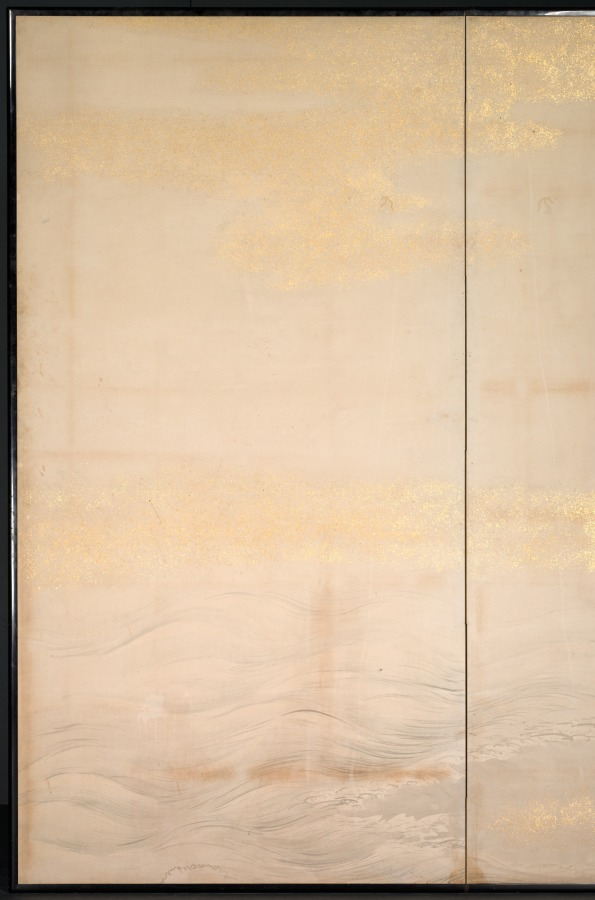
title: Geese, Reeds and Water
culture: Japan, Edo period (1615–1868)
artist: Yamamoto Baiitsu (Japanese, 1783–1856)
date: 1800s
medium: One of a pair of four-panel folding screens; ink, color, and cut gold foil on paper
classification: Painting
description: This byōbu composition differs from most in that it comprises two four-panel screens, rather than two six-panel units. Since the current mounting is modern, it is impossible to determine whether its present configuration represents its original design. Some panels may have been removed to help the screens better fit into a modern interior space. Baiitsu worked almost exclusively in monochromatic ink tones and favored classical Chinese painting themes.